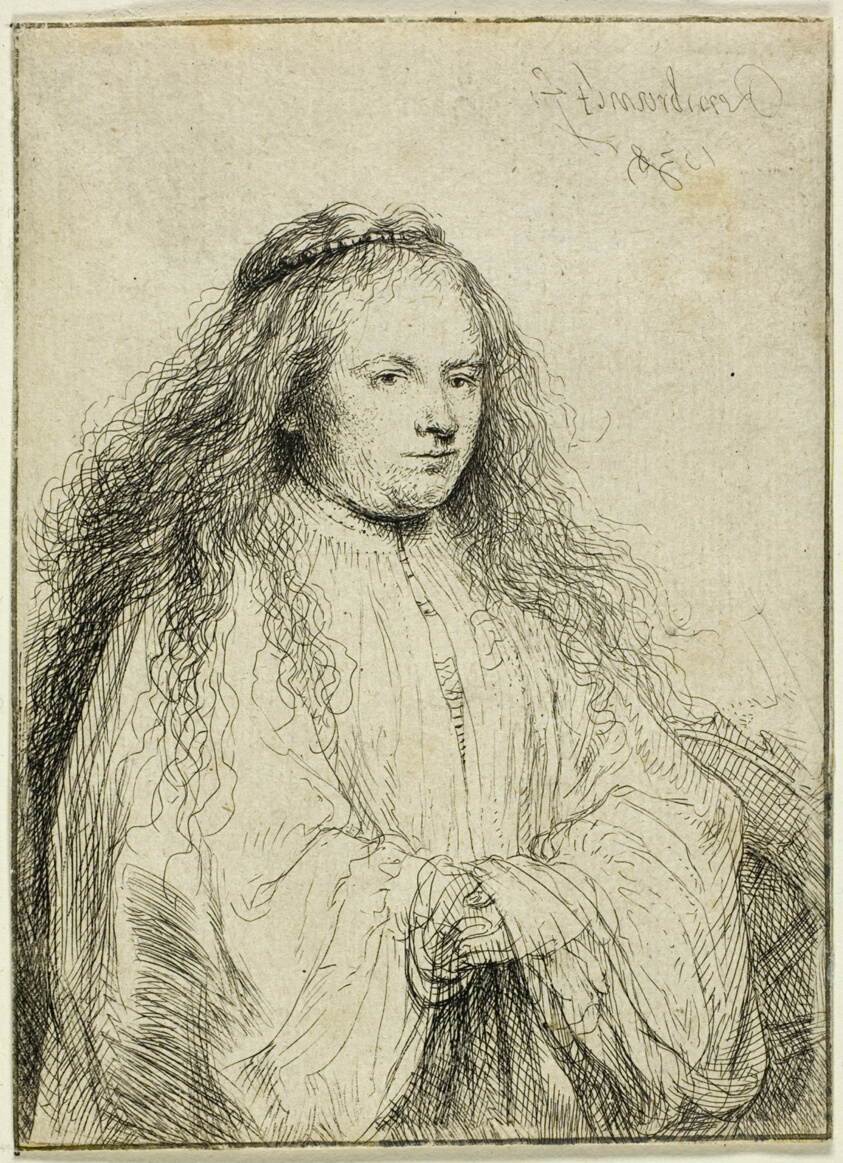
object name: Print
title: St Catherine (The Little Jewish Bride)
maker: Rembrandt van Rijn (Dutch, 1606-1669)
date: 1638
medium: Etching and drypoint on paper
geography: Holland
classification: etching; print; prints and drawing; paper; drypoint